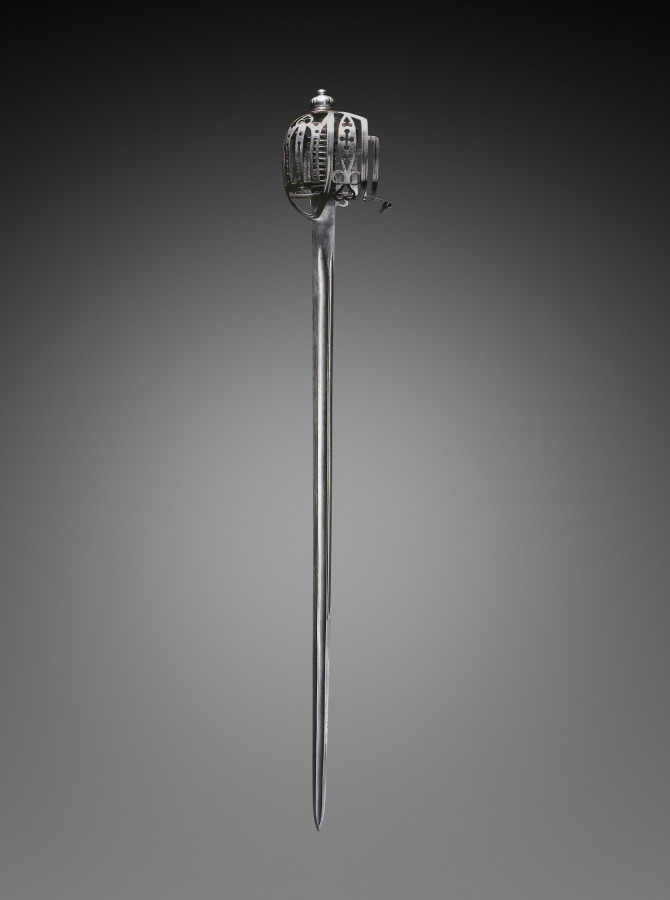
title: Basket-Hilt Broadsword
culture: Scotland, Stirling(?), 18th century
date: c. 1740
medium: steel, pierced hilt; wood and leather grip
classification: Arms and Armor